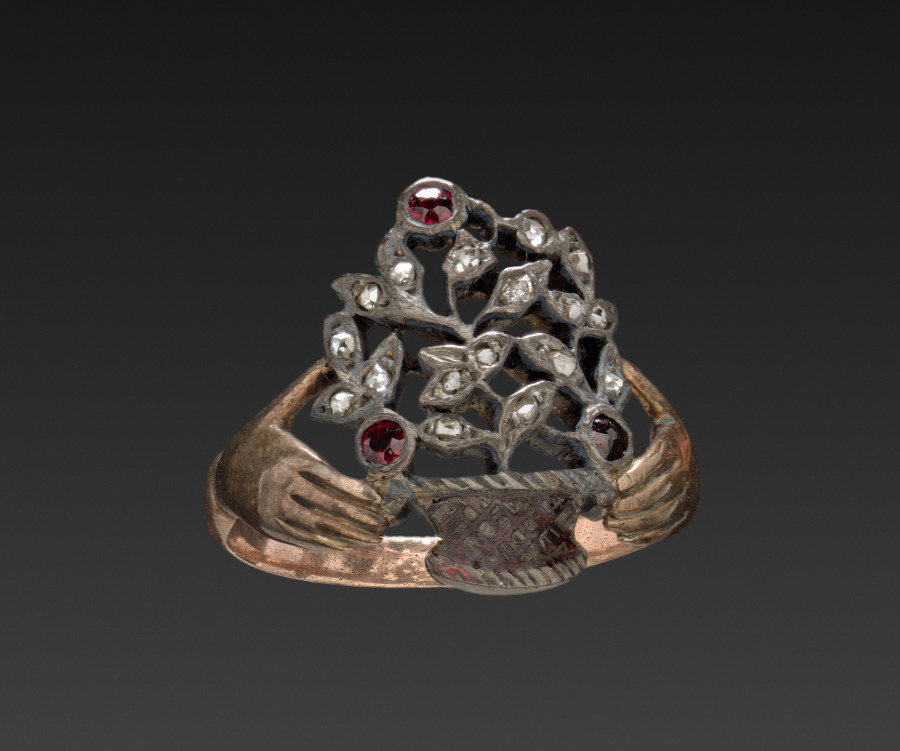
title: Ring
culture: France (?)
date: 1700s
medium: gold band, silver ornamental basket with garnet and diamond chips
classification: Jewelry